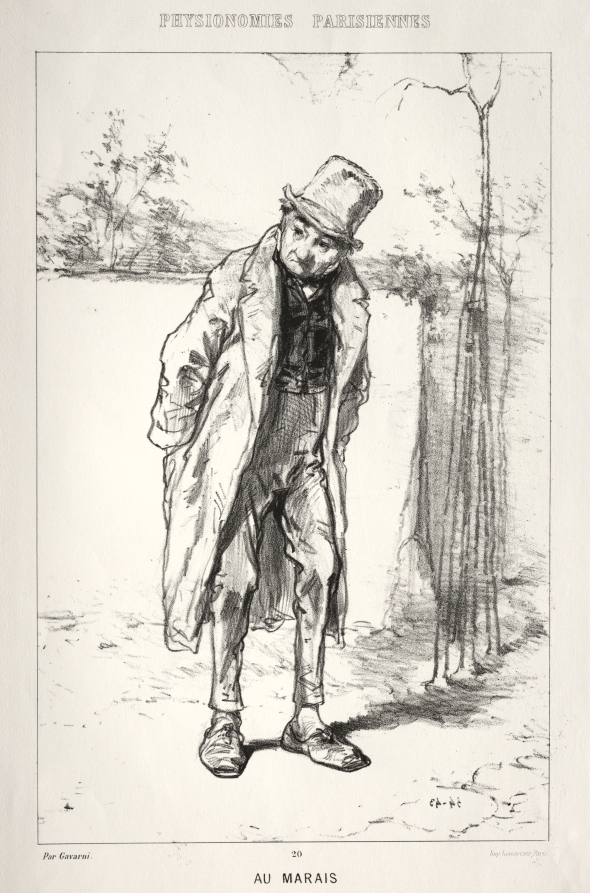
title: Physionomies Parisienne: Au Marais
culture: France, 19th century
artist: Paul Gavarni (French, 1804–1866)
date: 1869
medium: lithograph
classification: Print